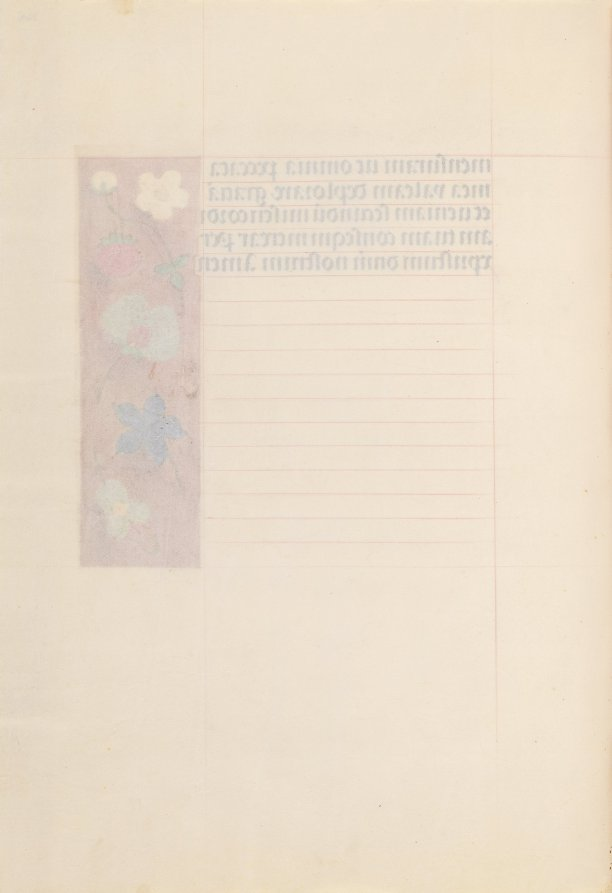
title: Hours of Queen Isabella the Catholic, Queen of Spain: Fol. 269v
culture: Flanders, Ghent and Bruges, late 15th century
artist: Master of the First Prayerbook of Maximillian (Flemish, c. 1444–1519)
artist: and Associates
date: c. 1500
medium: ink, tempera, and gold on vellum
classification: Bound Volume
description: This manuscript was illuminated by a circle of at least five highly organized manuscript painters active in the Flemish cities of Ghent and Bruges. The principal illuminator was Alexander Bening, who painted the majority of the book's miniatures. Manuscripts produced by this circle of artists are renowned for the decoration of their borders, which typically feature a rich variety of realistically-painted flowers, birds, and butterflies. This prayer book, called a book of hours, was intended not for a cleric, but for the private devotions of a lay person-in this case, Isabella the Catholic, Queen of Spain (1451-1504). Isabella's coat of arms embellishes the book's frontispiece. It is unlikely that the book was commissioned by the Queen herself; rather, she probably received it as a diplomatic gift from someone courting her patronage, perhaps Cardinal Francisco Jimenez de Cisneros. A Franciscan friar, Jimenez was dependent upon Isabella for his advancement, first to the post of Queen's confessor in 1492, and then to Archbishop of Toledo in 1495.